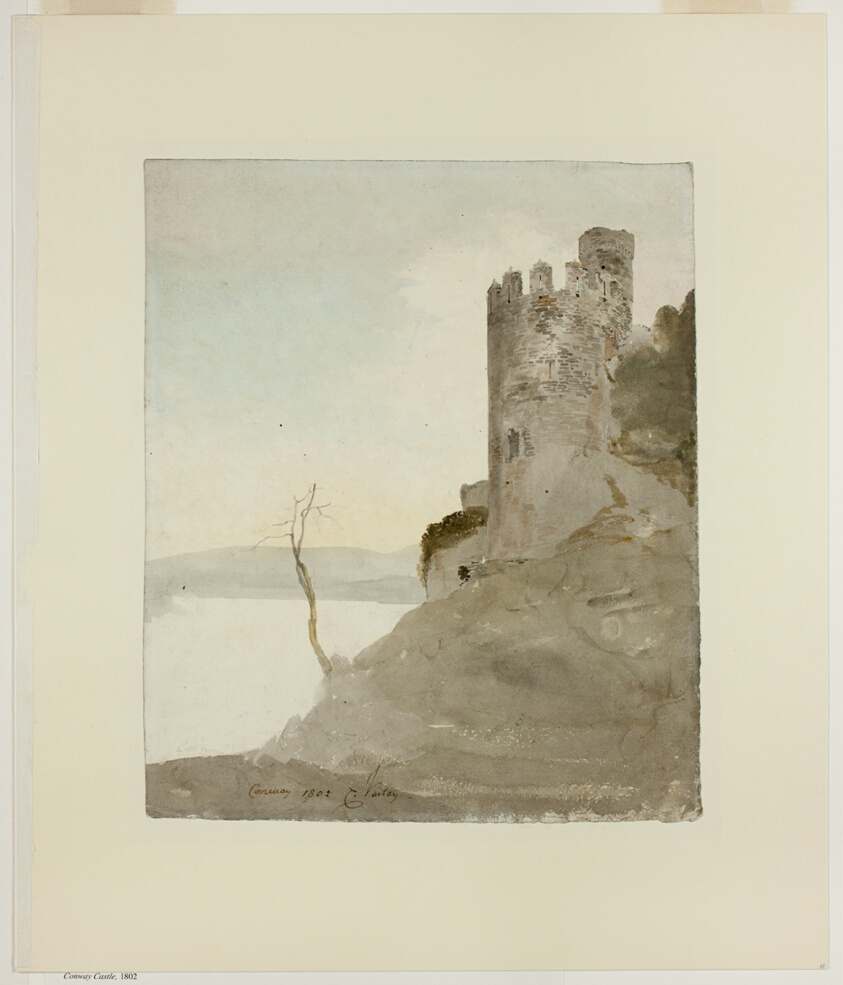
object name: Drawing and Watercolor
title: Conway Castle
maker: Cornelius Varley (English, 1781-1873)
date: 1802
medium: Watercolor over traces of graphite on ivory wove paper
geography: England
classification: paper; watercolor; prints and drawing